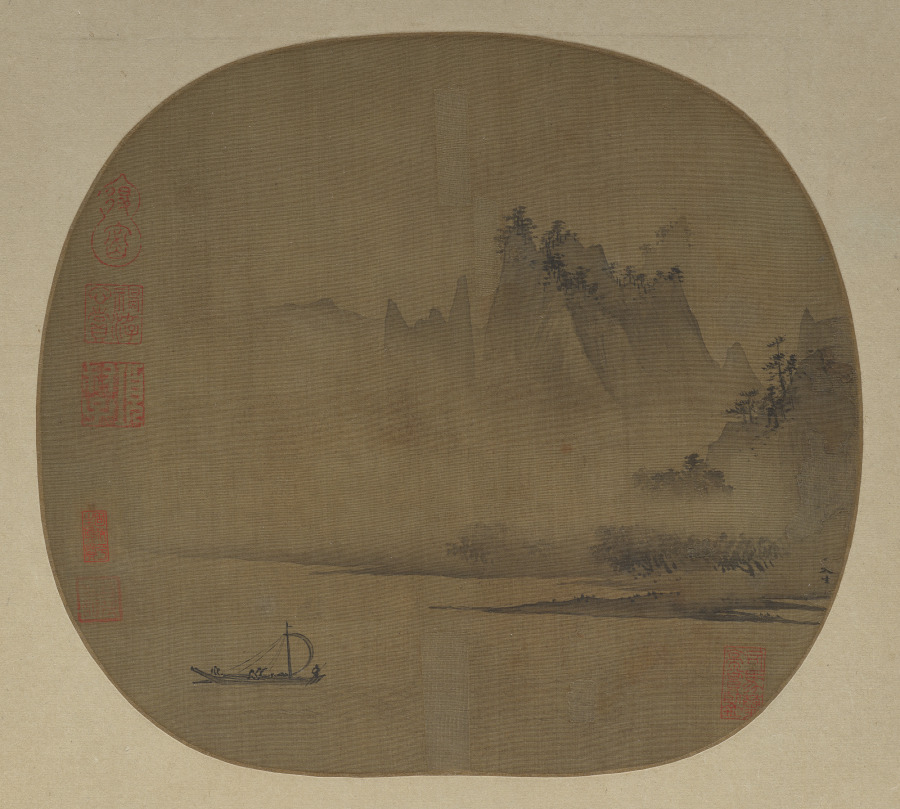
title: Full Sail on the Misty River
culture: China, Southern Song dynasty (1127-1279)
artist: assisted by Xia Sheng (Chinese, active 1200s)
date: 1200s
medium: Fan painting; ink on silk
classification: Painting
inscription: Artist's signature: Xia Sheng 夏生